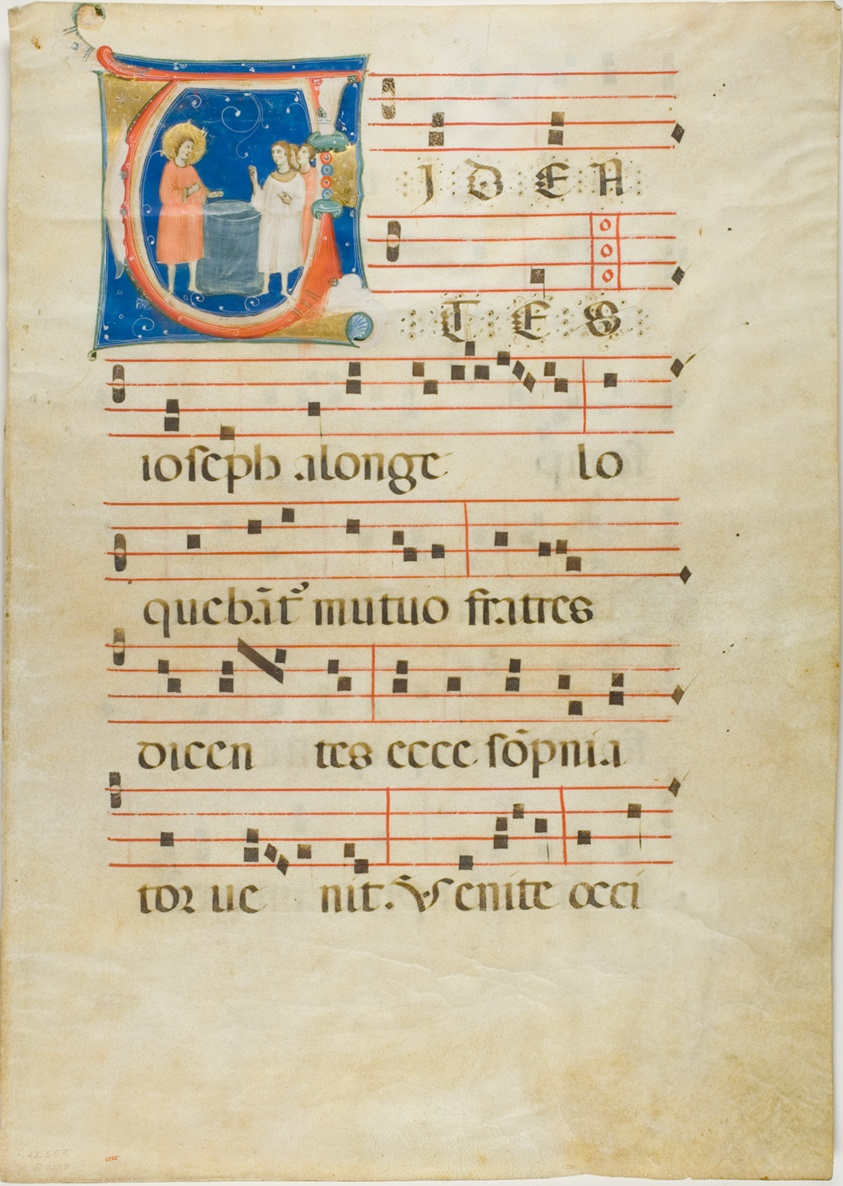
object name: Drawing and Watercolor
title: Joseph and his Brothers at the Well, Initial V from an Antiphonary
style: medieval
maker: Neri da Rimini (Italian (Rimini), active 1300-1338)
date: 1310/15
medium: Opaque watercolor, with shell gold and pen and brown ink (recto), pen and brown ink, with opaque watercolor (verso), on parchment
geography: Italy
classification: tempera; manuscript; drawings (visual works); prints and drawing